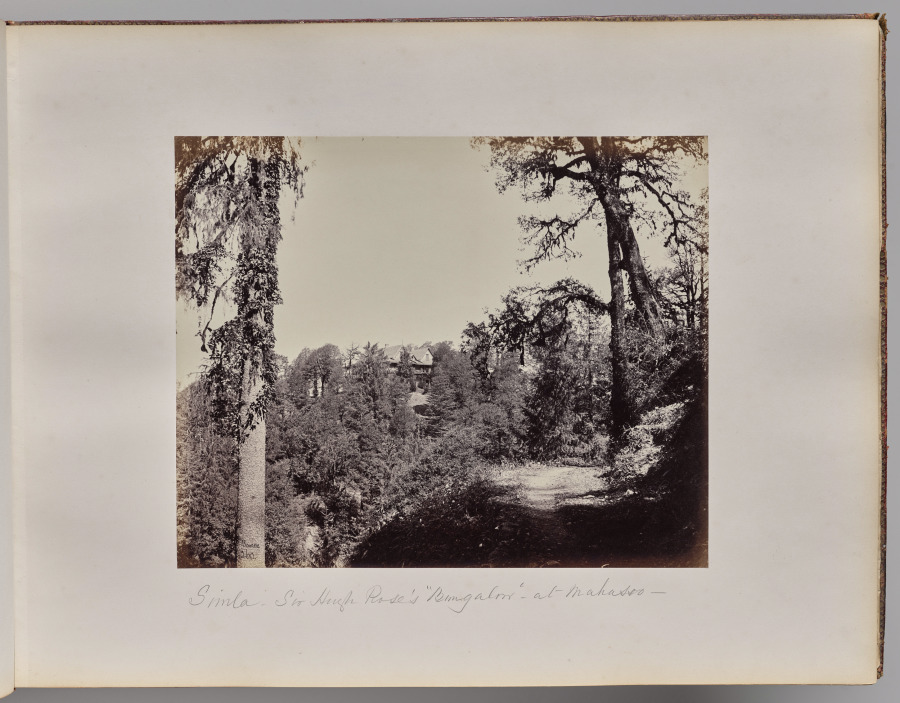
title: Shimla. Sir Hugh Rose's Bungalow at Mahasso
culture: England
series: Photographs of Northern India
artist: Samuel Bourne (British, 1834–1912)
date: 1863–70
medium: albumen print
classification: Photograph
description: The 50 images in this album, all taken in the 1860s, move from the hill towns of the Himalayas down to cities including Lahore (now in Pakistan), Delhi, Lucknow, Agra, Benares (now Varansi), and Calcutta (now Kolkata). Architectural studies of major monuments offer valuable historical records of what sites such as the Taj Mahal and the imperial mosque of the Mughal emperors in Delhi looked like before 20th-century restorations.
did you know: Samuel Bourne, the author of most the images in this album, was a banker in England before he moved to India to become a professional photographer.